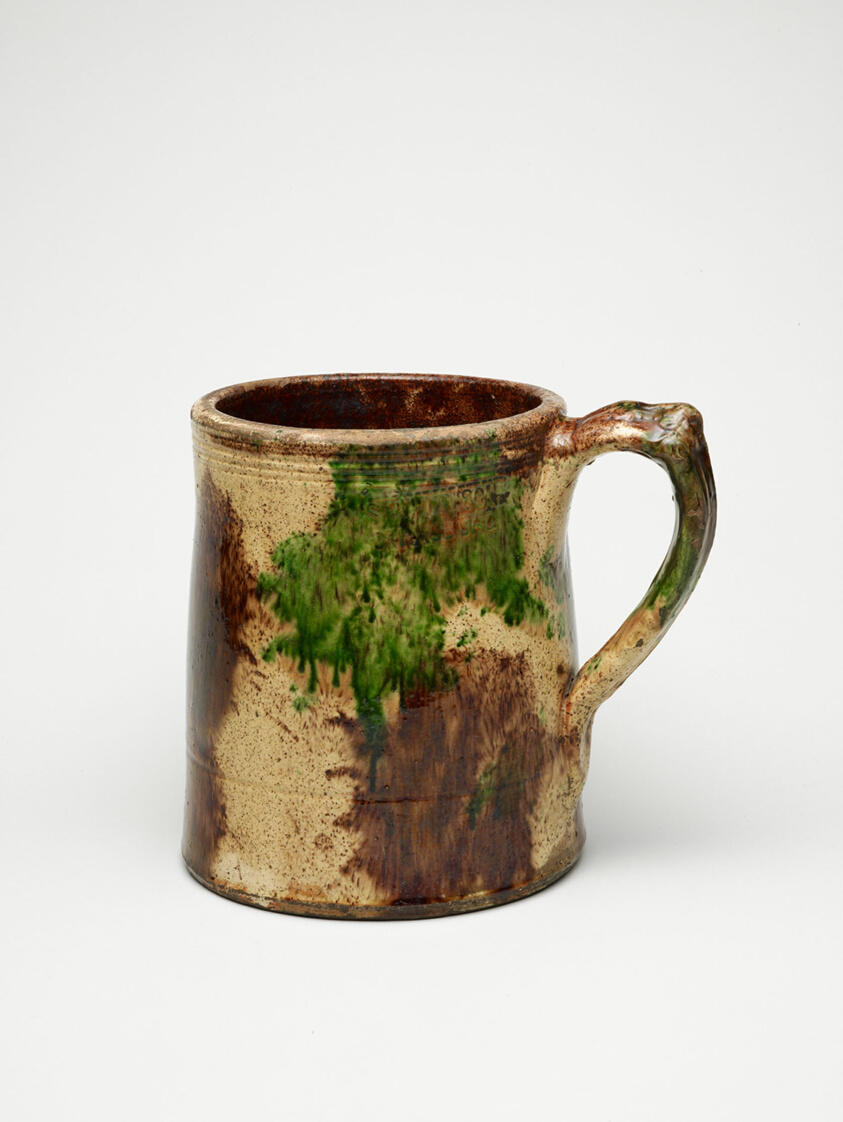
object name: Decorative Arts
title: Mug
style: Folk Art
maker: S. Bell and Sons; American, 1882-1908; Strasburg, Virginia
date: 1882–1900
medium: Earthenware, slip, and lead, copper, and manganese oxide glazes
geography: Strasburg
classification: drinking vessel; ceramics; american decorative arts; american arts; decorative arts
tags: dining, drinking